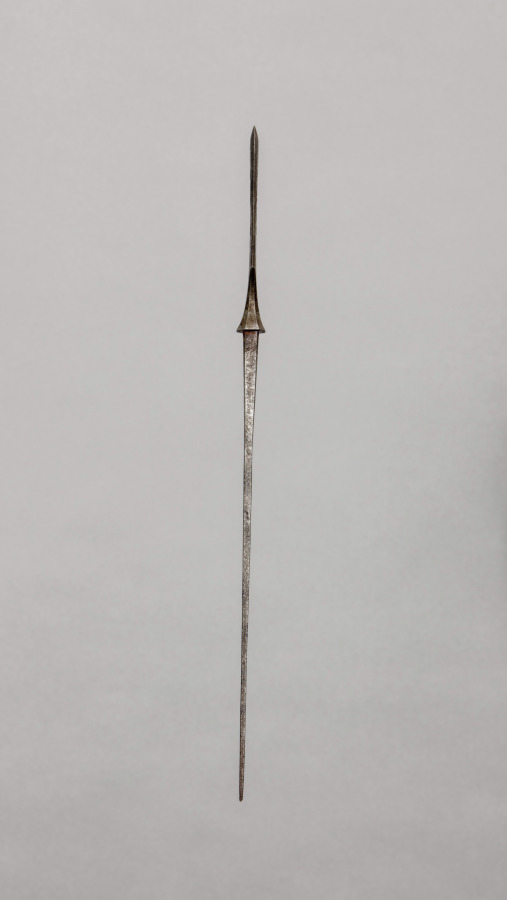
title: Arrow Point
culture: Japan, Edo period (1615–1868)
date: 1700s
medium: steel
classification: Arms and Armor